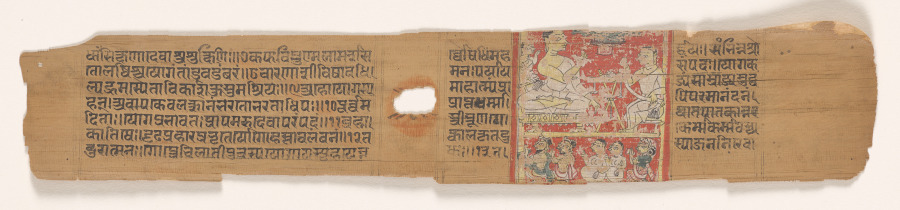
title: Jain monk with disciple and two laymen, two nuns, and a laywoman, folio 22 (recto) from a Yoga-shastra of Hemachandra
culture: Western India, Gujarat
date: c. 1275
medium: Gum tempera and ink on palm leaf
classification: Painting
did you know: The nuns at the bottom cover their breasts by wearing the white robe over both shoulders.